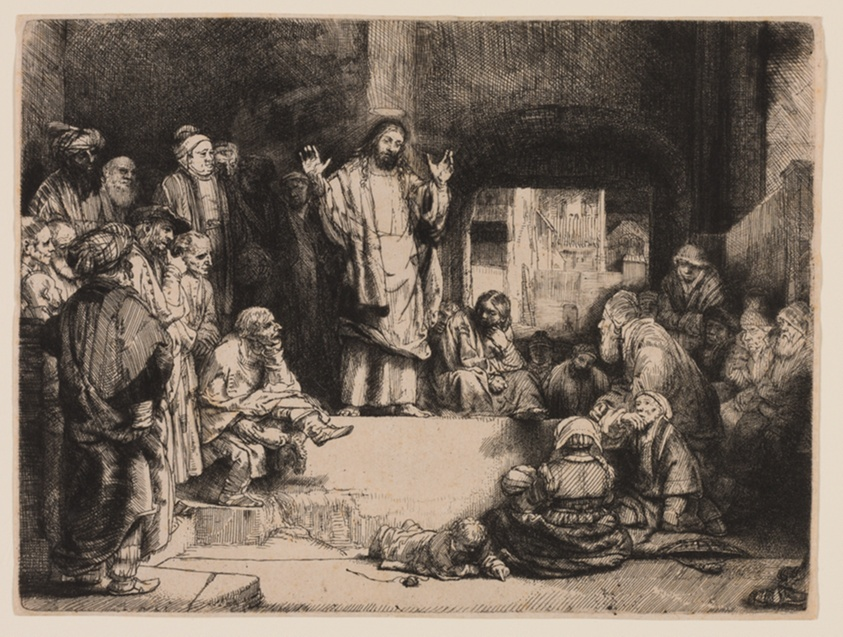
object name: Print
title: Christ Preaching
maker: Rembrandt van Rijn (Dutch, 1606-1669)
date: c. 1657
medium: Etching, burin, and drypoint on ivory laid paper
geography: Holland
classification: etching; print; prints and drawing; paper; drypoint; burin